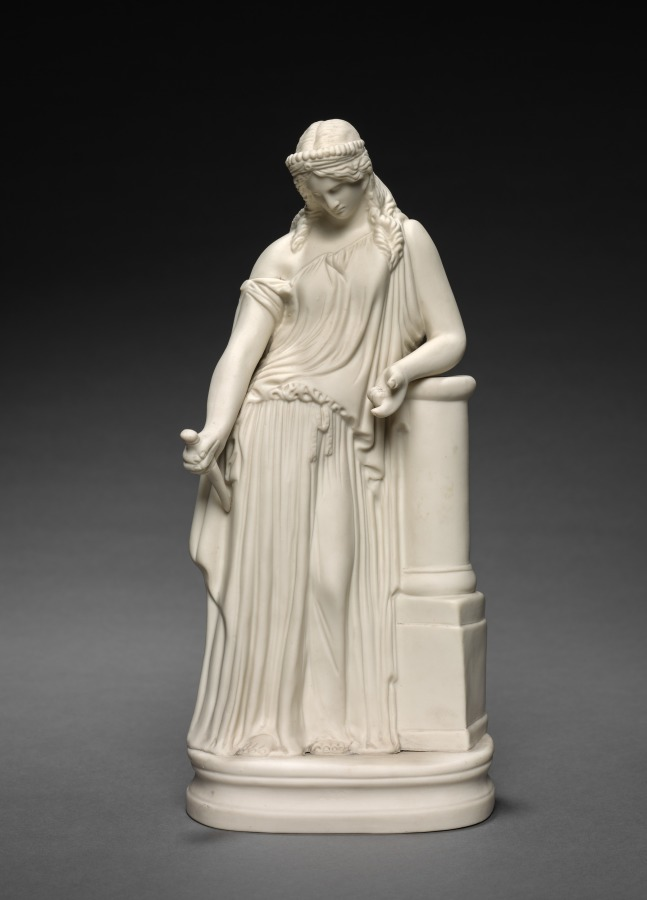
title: Figure of Medea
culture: England, 19th century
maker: W. T. Copeland & Sons (British)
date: c. 1870–1890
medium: Parian porcelain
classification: Ceramic